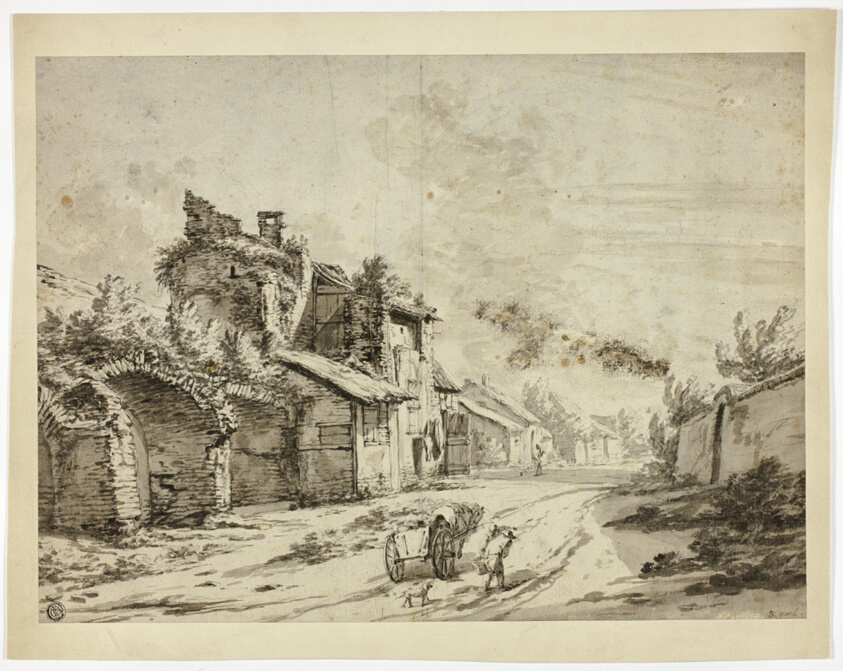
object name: Drawing and Watercolor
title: Horse, Cart and Peasants on Road by Old Houses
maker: Pieter Mulier (Dutch, c. 1637-1701); or Franz Edmund Weirotter (Austrian, 1730-1771); or Barend Gael (Dutch, c. 1620-1687/1703)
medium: Black chalk, with brush and brown wash, on ivory laid paper, laid down on card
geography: Holland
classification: ink or chalk wash; drawings (visual works); prints and drawing